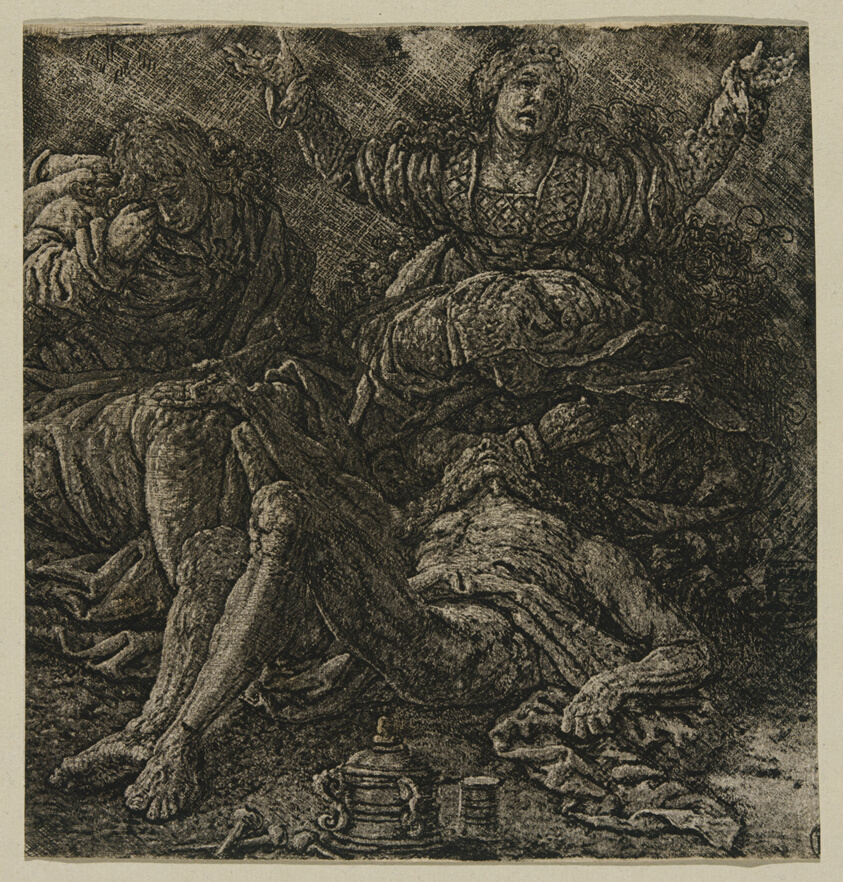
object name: Print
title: The Lamentation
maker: Hercules Segers (Dutch, 1589/90-1633/40)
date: c. 1607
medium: Etching in brown-black on ivory laid paper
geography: Holland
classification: soft-ground etching; etching; print; prints and drawing